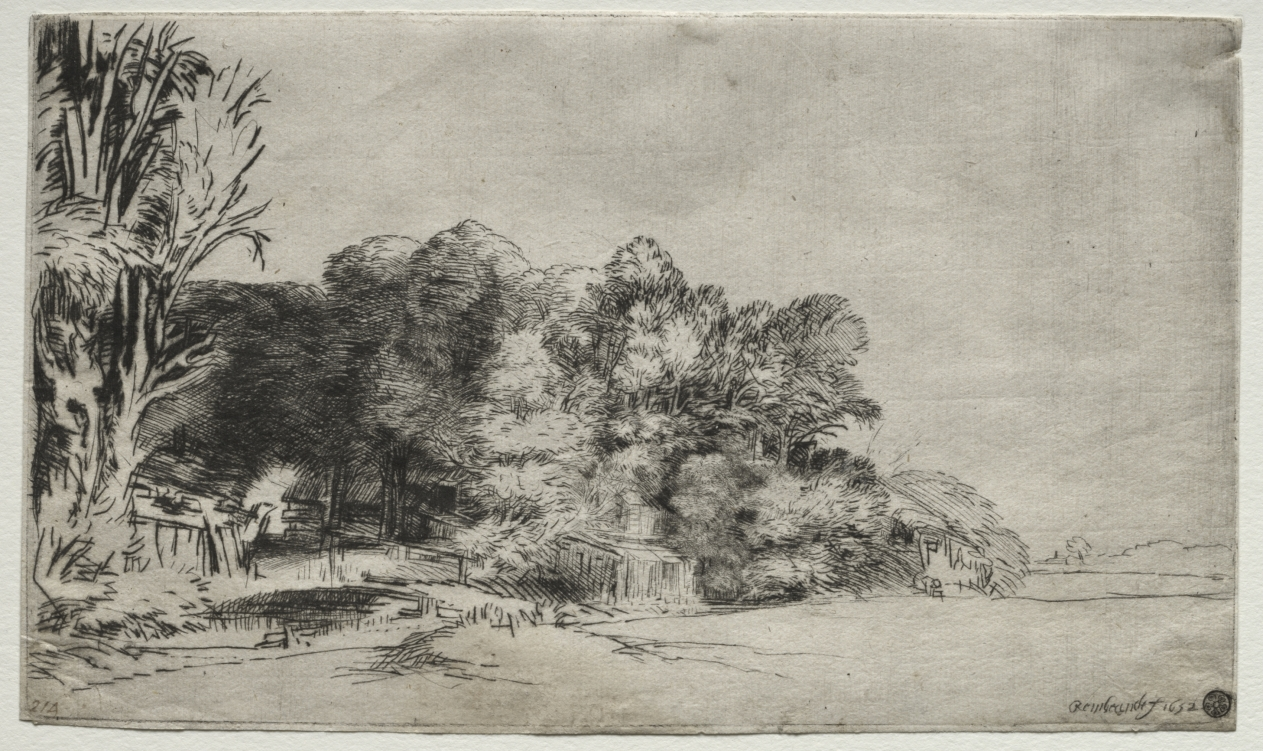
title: Clump of Trees with a Vista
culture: Netherlands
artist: Rembrandt van Rijn (Dutch, 1606–1669)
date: 1652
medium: etching and drypoint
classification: Print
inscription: lower right, in plate: Rembrandt f 1652 ; lower left, in pen and brown ink: 214 ; VERSO, upper left, in graphite: 331 ; upper right, in graphite: 1520/7[upside down]; lower left, in graphite: a58331[underlined]; lower left, in graphite: 16[curved line above]; lower center, in graphite: 9119 l ; lower right, in graphite: 214